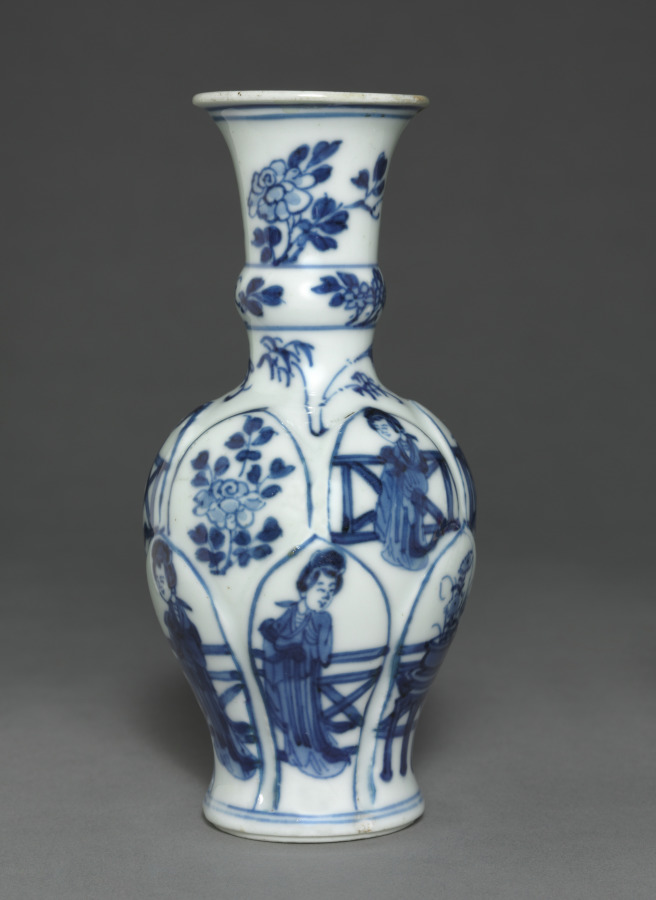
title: Vase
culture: China, Qing dynasty (1644-1911), Daoguang reign (1821-1850) - Xianfeng reign (1851-1861)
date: 19th Century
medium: porcelain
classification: Ceramic